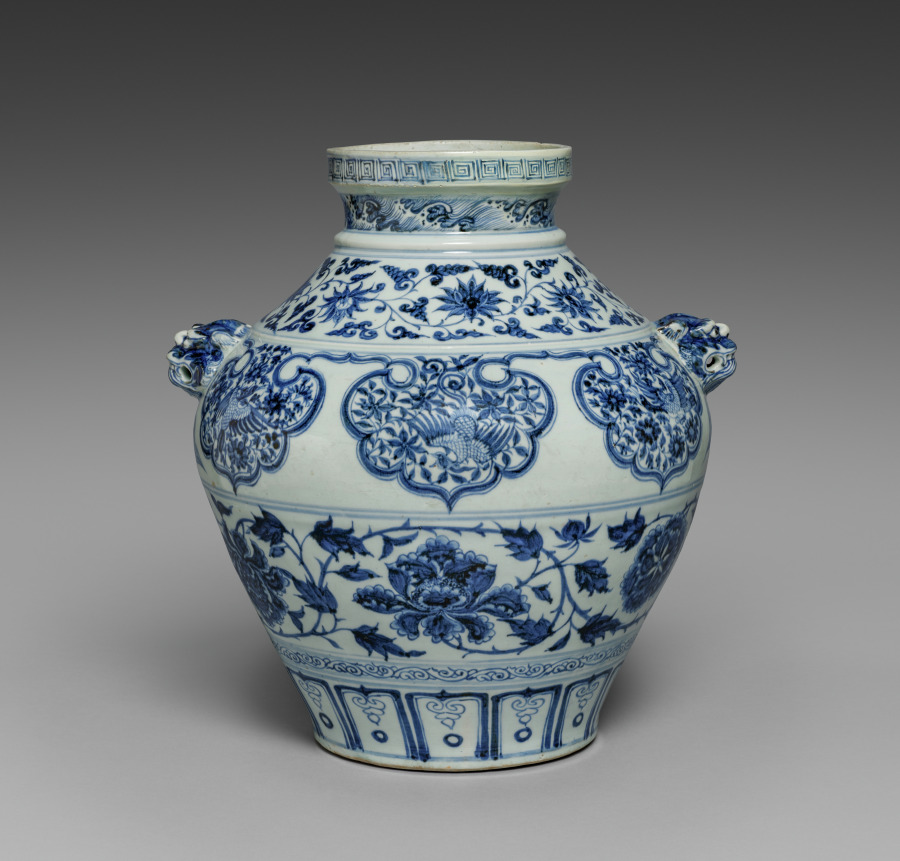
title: Jar with Lion-Head Handles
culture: China, Jiangxi Province, Jingdezhen, Yuan dynasty (1271–1368)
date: 1300s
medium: porcelain with underglaze painted decoration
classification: Ceramic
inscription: 南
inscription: 宮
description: Appreciated for its strong profile, brilliant blue color, and firm delineation of the decorative patterns, this jar is a classic example of Yuan dynasty blue-and-white ware. This type of ware was produced no later than the 1330s for both domestic use (the court and common people alike) and overseas trade. This example testifies to the transmission of artistic ideas and techniques between China and the rest of the great Mongol Empire as a result of trade. The cobalt that was used for the blue underglaze decoration was imported from Iran, likely from Kashan. The band of cloud-collar motifs with phoenixes set against floral grounds, as shown here, is an artistic vocabulary that can also be found in Iranian decorative arts of the Ilkhanid period (1256–1353).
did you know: The characters for "palace" and "south" are scratched into the white glaze on the vessel's shoulder, suggesting that it was once kept in a specific location in a palace.